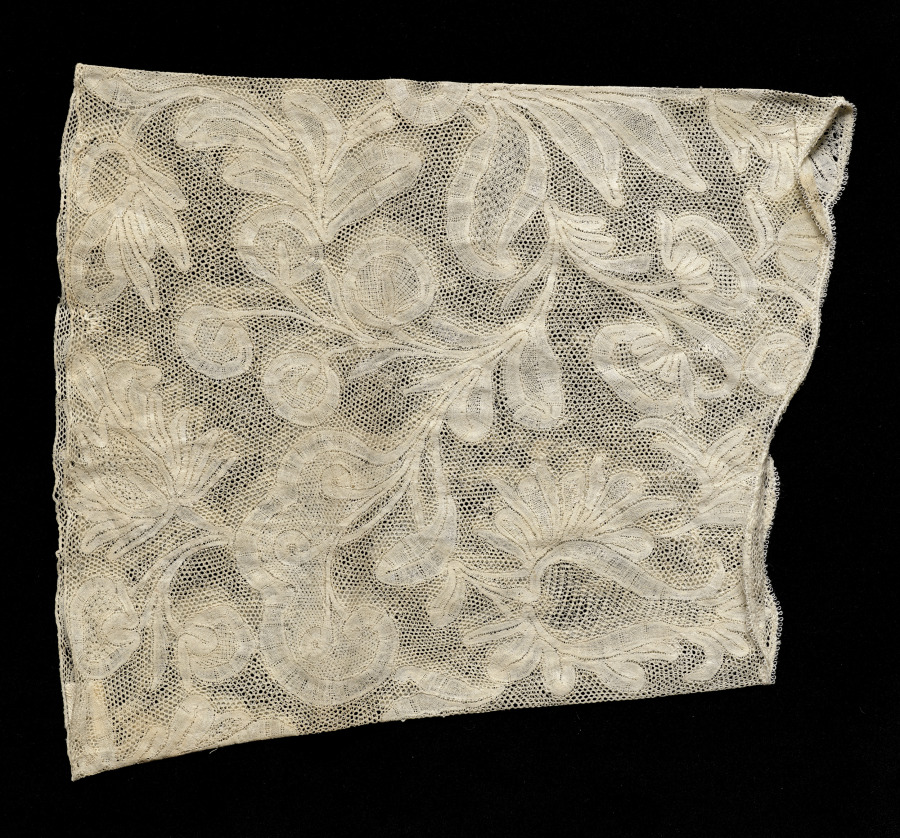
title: Lace Cuff (one of a pair)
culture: Italy, Milan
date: 1700s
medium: Linen: bobbin lace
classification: Lace